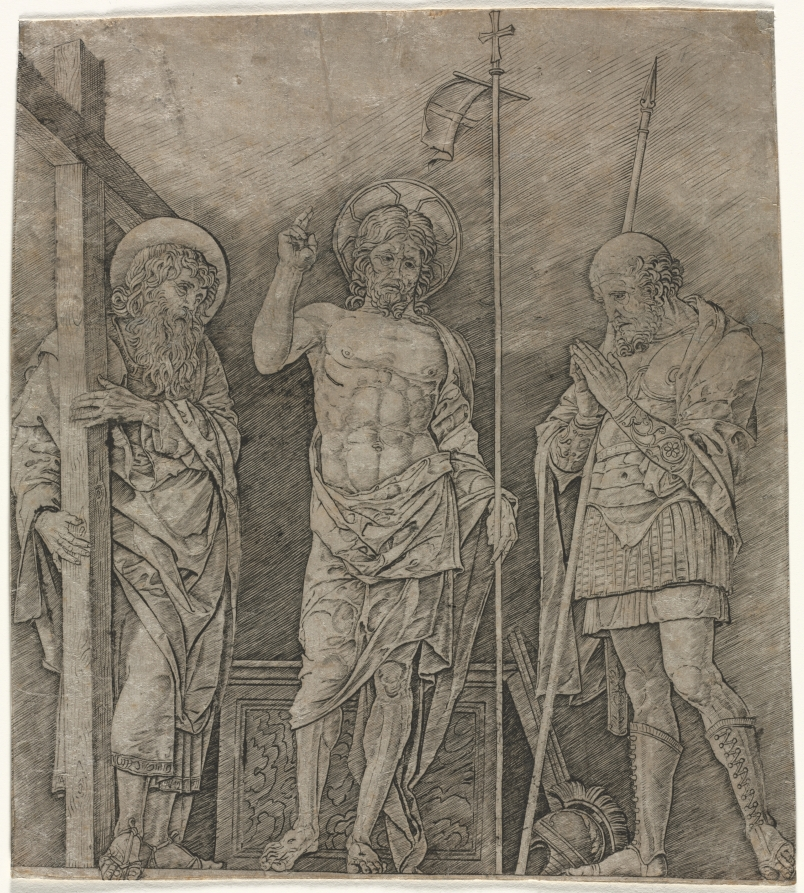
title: The Risen Christ between St Andrew and Longinus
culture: Italy, 15th century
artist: Andrea Mantegna (Italian, about 1431–1506)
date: early 1470's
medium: engraving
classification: Print